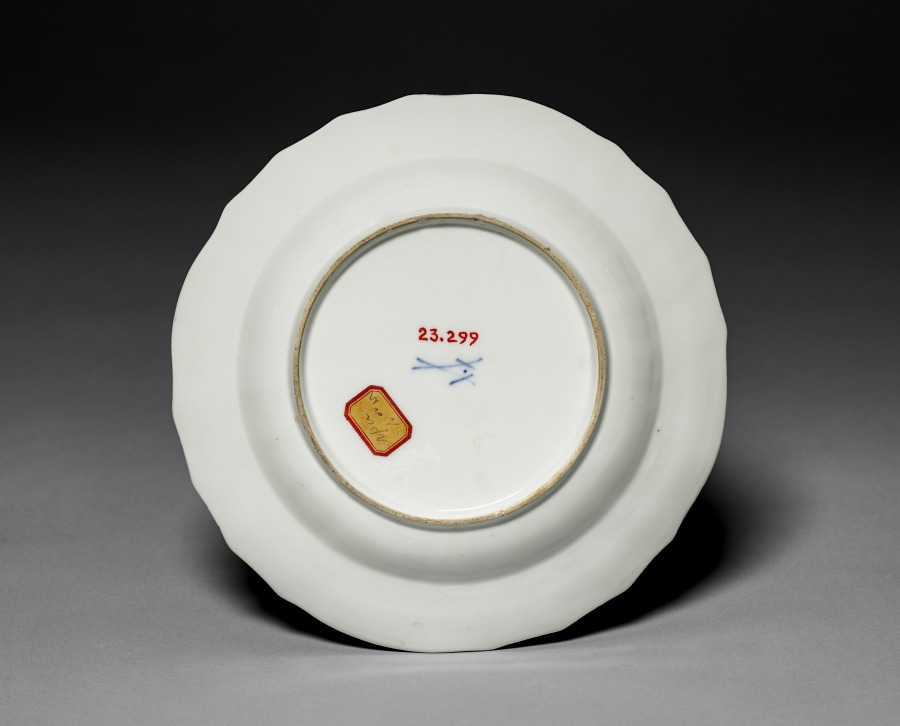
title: Plate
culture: Germany, 18th century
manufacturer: Meissen Porcelain Factory (German, est. c. 1710)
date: 1756–1780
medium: porcelain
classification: Ceramic